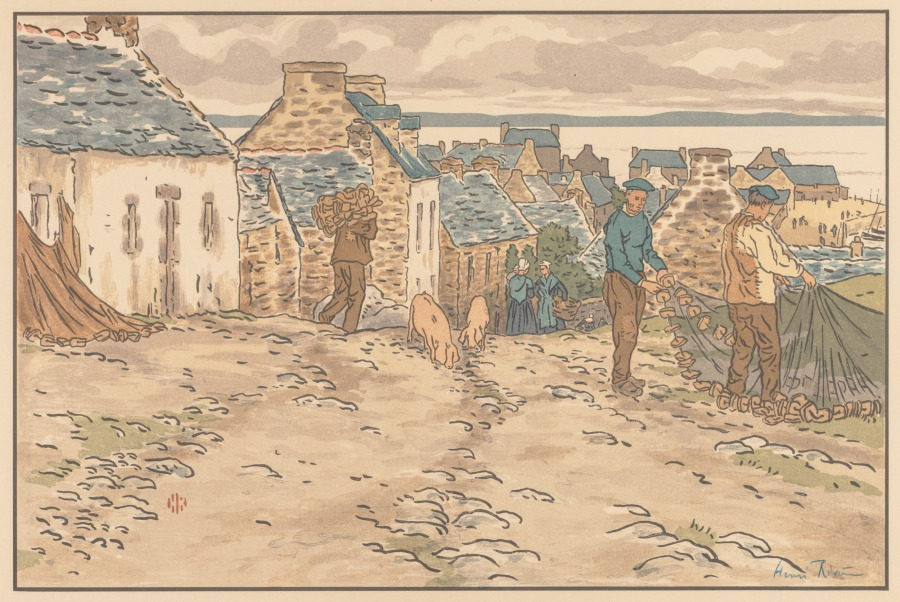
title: The Beautiful Countryside in Brittany: Street in Tréboul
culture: France, 19th century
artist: Henri Rivière (French, 1864–1951)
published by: Printed by Eugene Verneau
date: 1898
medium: color lithograph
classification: Print